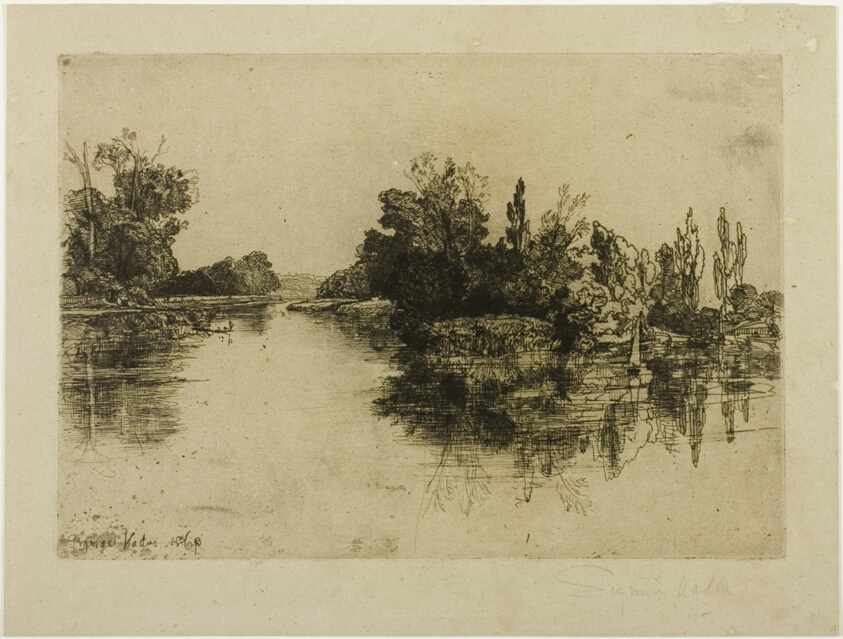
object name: Print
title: The Island Opposite Boyle's Farm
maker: Francis Seymour Haden (English, 1818-1910)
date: 1869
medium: Etching with drypoint on copper on ivory laid paper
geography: England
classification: etching; print; prints and drawing